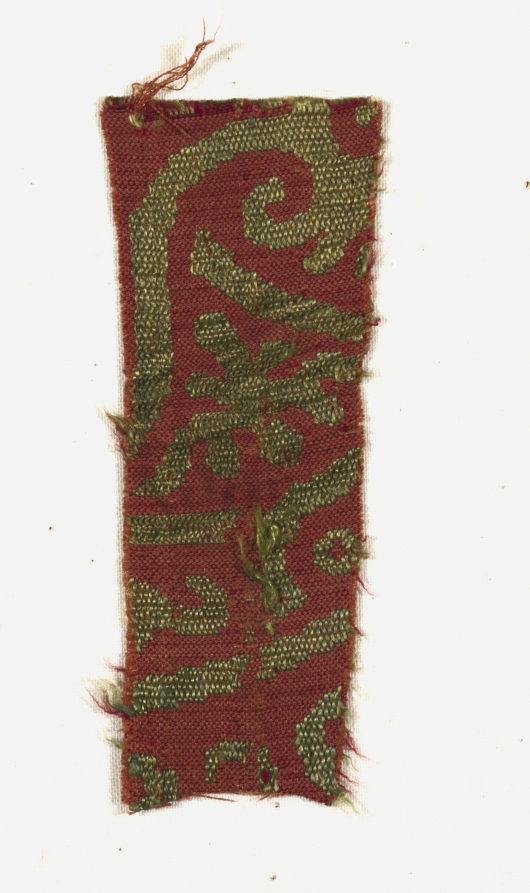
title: Silk Fragment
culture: Spain, Islamic period or Mudejar, 13th century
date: 13th century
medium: lampas weave, brocaded; silk and gold thread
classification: Textile